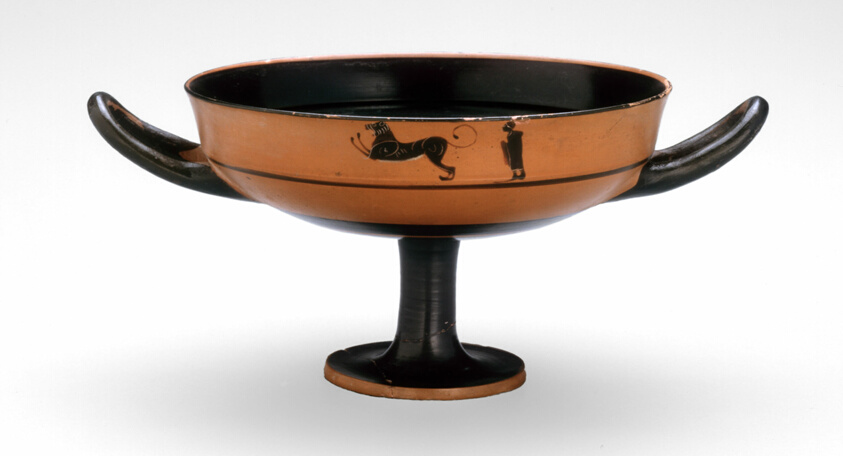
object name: Vessel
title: Kylix (Drinking Cup)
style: archaic (greek), black-figure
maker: Greek; Athens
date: about 540-530 BCE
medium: terracotta, black-figure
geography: Polis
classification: drinking vessel; vessel; ancient art